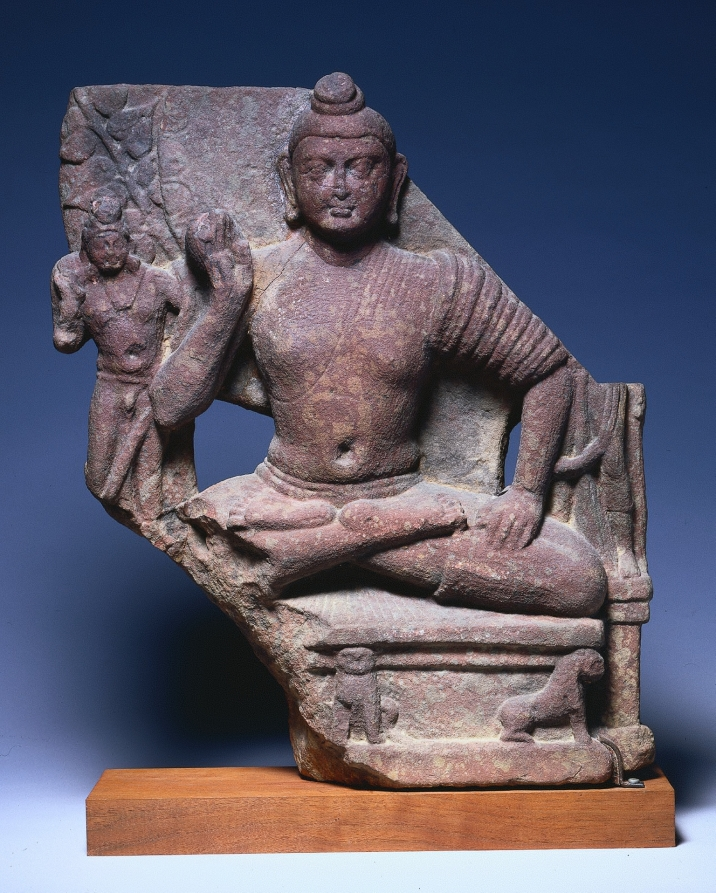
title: Seated Shakyamuni Buddha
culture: Northern India, Uttar Pradesh, Mathura, Kushan period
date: c. 120 CE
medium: red mottled sandstone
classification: Sculpture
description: This early form of the Buddha image depicts him seated on an altar under the Bodhi tree. A coiled topknot of hair and elongated earlobes refer to his life as a prince when he wore a turban and heavy earrings. Behind his head is a solar disk, like a halo, and lions on the throne indicate the spreading of his teachings in all four directions.